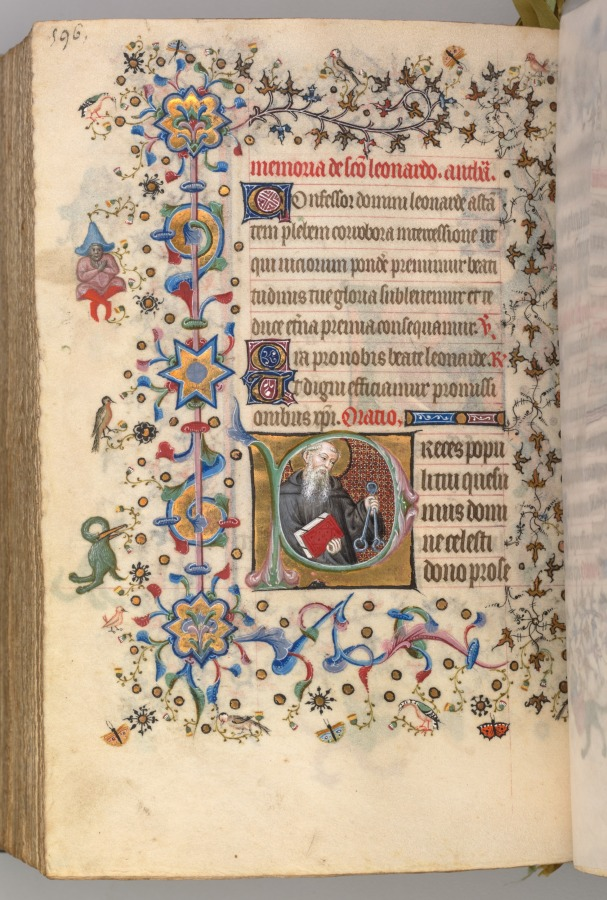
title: Hours of Charles the Noble, King of Navarre (1361-1425): fol. 292v, St. Leonard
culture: France, Paris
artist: Master of the Brussels Initials and Associates (French)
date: c. 1405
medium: ink, tempera, and gold on vellum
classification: Bound Volume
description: This precious volume was obviously highly prized by its owner, the French-born King of Navarre, who had his coat of arms painted on no less than twenty folios. Rather than directly commissioning this manuscript from a specific workshop, it seems that Charles the Noble acquired his book of hours -- perhaps ready-made for the luxury market -- while on a trip to Paris in 1404-05. A collaborative effort, six painting styles are evidenced within the pages of this codex, those of two Italians, two Frenchmen, and two Netherlanders. The painter who was responsible for the planning and decoration of the book, and who produced seventeen of the large miniatures, was a Bolognese artist known as the Master of the Brussels Initials. His principal assistant, responsible for most of the borders, was a Florentine who signed his name "Zecho" da Firenze on folio 208 verso.